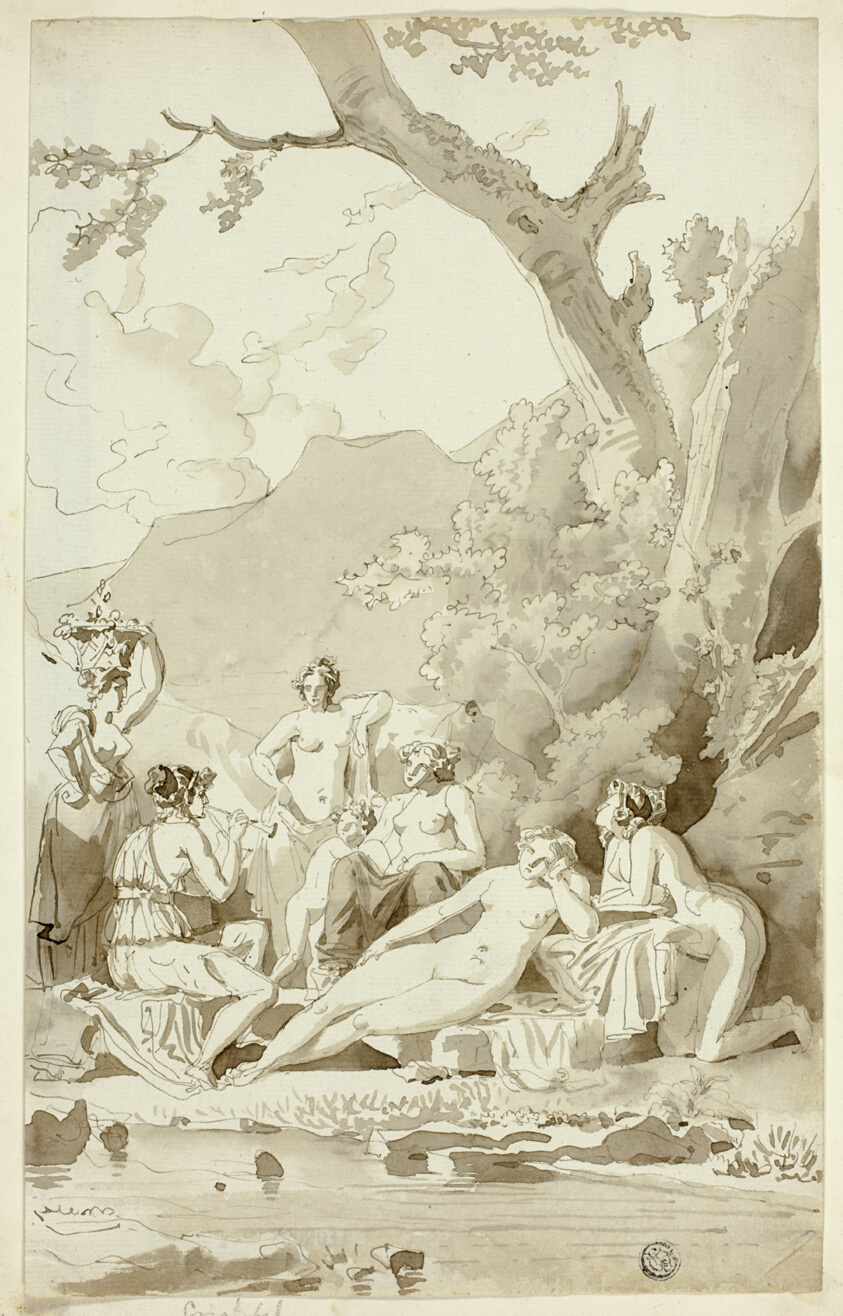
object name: Drawing and Watercolor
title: Nymphs in a Wooded Grove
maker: Juan Cristobal (Spanish, active 1584-1594)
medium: Pen and brown ink, with brush and brown wash, on ivory laid paper, tipped on ivory wove paper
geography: Spain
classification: ink or chalk wash; drawings (visual works); prints and drawing